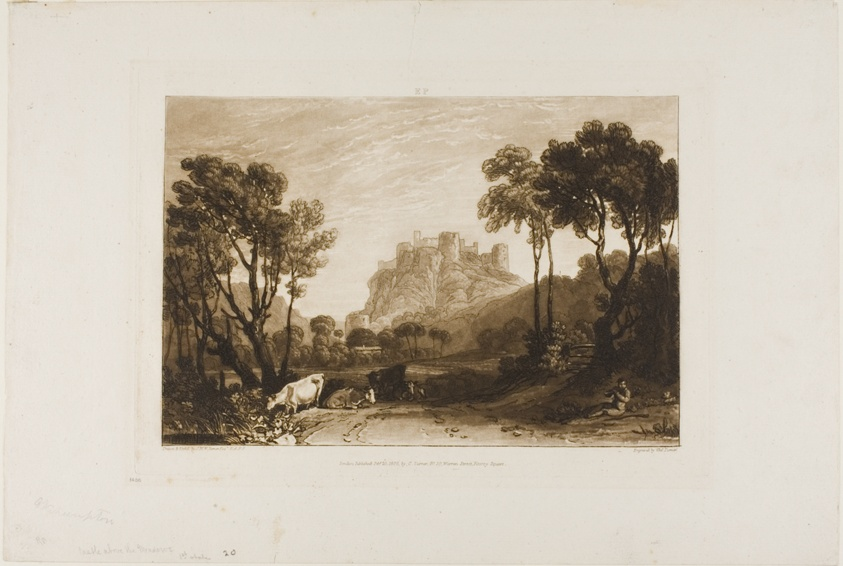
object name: Print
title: The Castle Above the Meadows, plate 8 from Liber Studiorum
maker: Joseph Mallord William Turner (English, 1775-1851); Engraved by Charles Turner (English, 1773-1857)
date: published February 20, 1808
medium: Etching and engraving on ivory paper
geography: England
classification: etching; print; prints and drawing